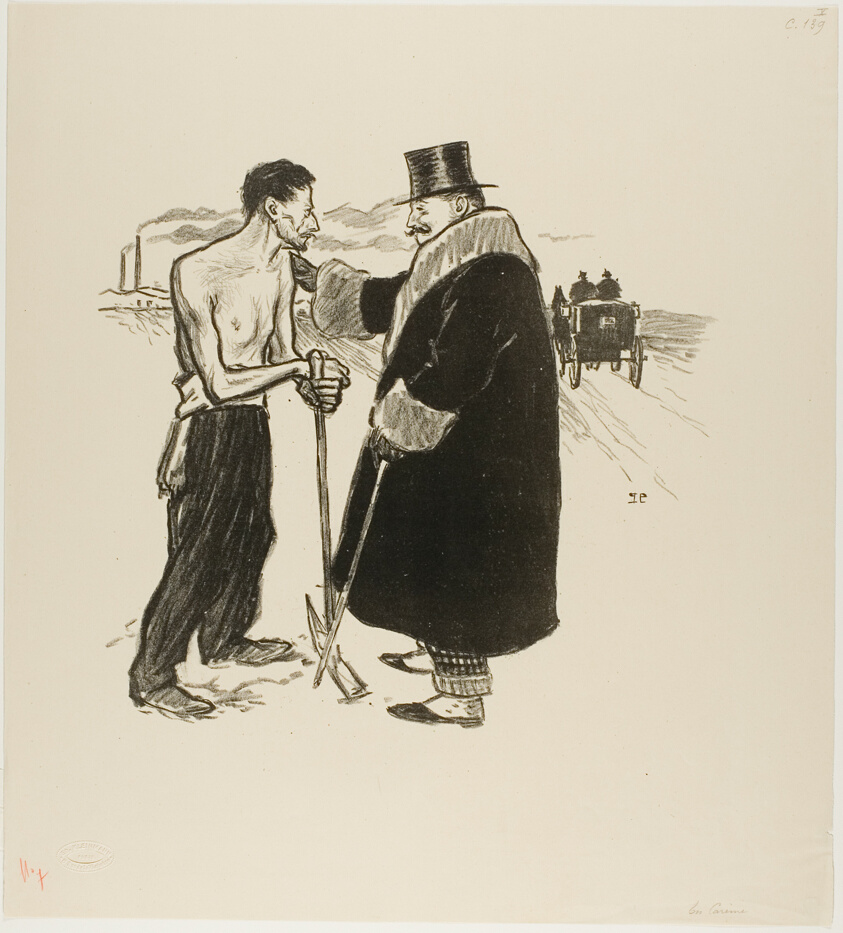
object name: Print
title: Lent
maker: Théophile-Alexandre Steinlen; French, born Switzerland, 1859-1923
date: February 1894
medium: Lithograph in black on cream wove paper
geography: France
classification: lithograph; print; prints and drawing